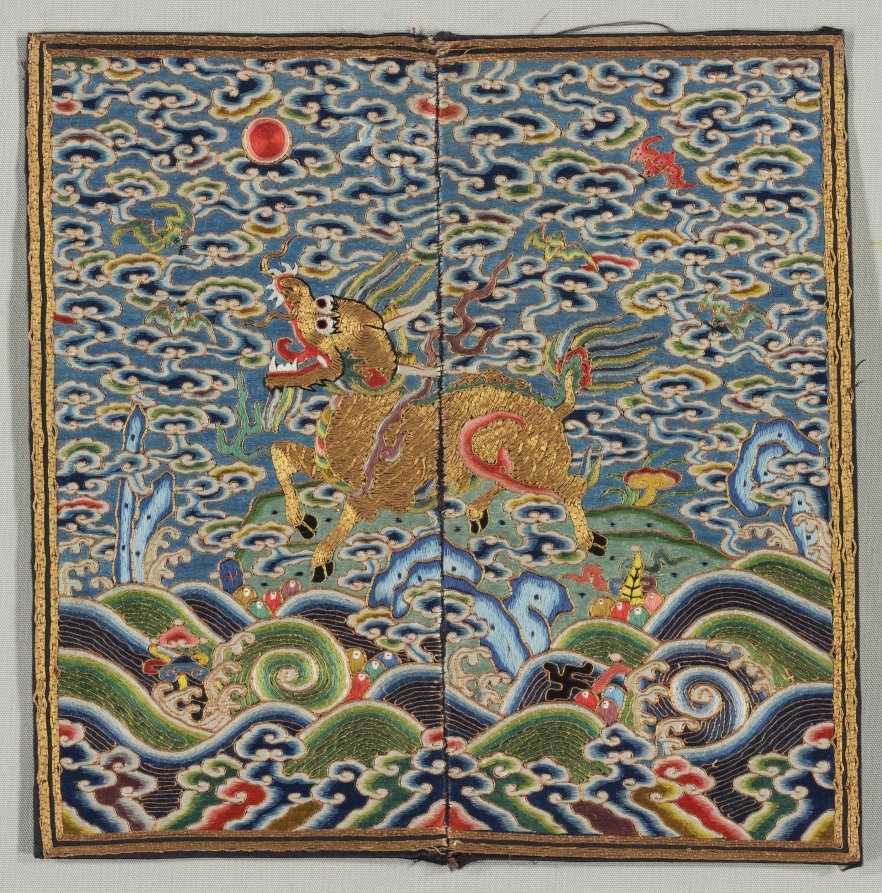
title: Rank Badge (buzi)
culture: China, Qing dynasty (1644–1911), Qianlong reign (1736–95)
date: 1736–95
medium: Silk: satin weave; silk and metal thread: embroidery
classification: Embroidery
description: Rank badges (also called rank insignia or Mandarin squares) were used in China during the Ming (1368–1644) and Qing (1644–1911) dynasties to demonstrate the wearer’s rank. In 1391 new clothing regulations directed court officials to wear decorative squares indicating their rank—birds for civil officials and animals for military officials. During the Qing dynasty rank badge design was regulated, and certain creatures were associated with specific ranks. Qing badges depict a representation of the universe with a landscape and a central creature, surrounded by clouds and facing the sun. The sun represented the emperor and this composition showed the official’s loyalty to him. An official’s wife wore rank badges that mirrored her husband’s. Most of the examples in CMA’s collection depict creatures facing a sun on the left. Attached to the front and back of a ceremonial robe, rank badges were woven in pairs with identical imagery. One was divided vertically up the center to attach to the front of a robe with a center opening. Rank badges are generally square or rectangular, although round examples exist. They are typically satin weave or slit tapestry weave (kesi) silk. Satin weave badges often have dark backgrounds with silk and/or metal thread embroidery. Some badges incorporate peacock feathers or beads. Late in the Qing dynasty appliqué replaced embroidery to allow for quicker production and a change in rank.